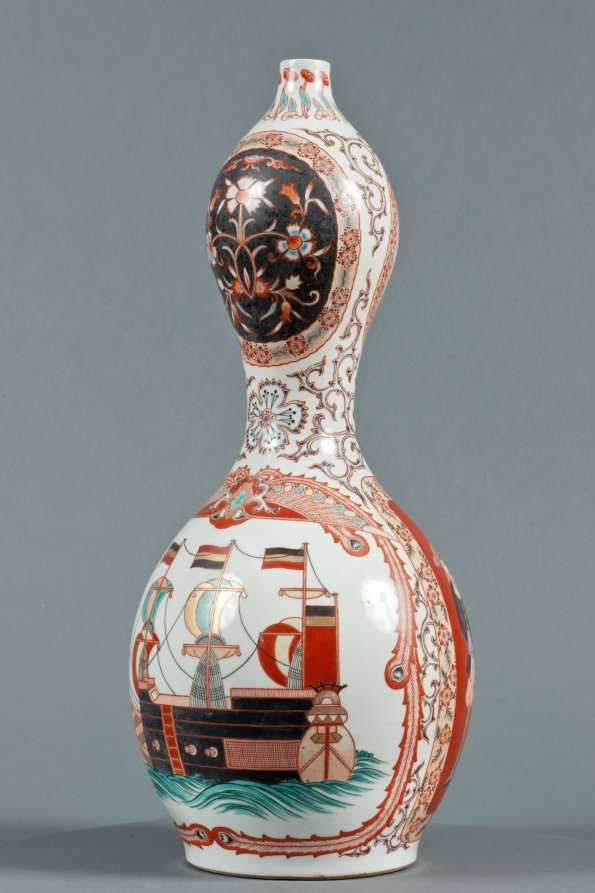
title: Bottle with Western Ships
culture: Japan, Edo period (1615–1868)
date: c. 1800–1868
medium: Porcelain with decoration in colored enamels and underglaze blue, overglaze enamels, and gold (Hizen ware, Arita type)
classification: Ceramic